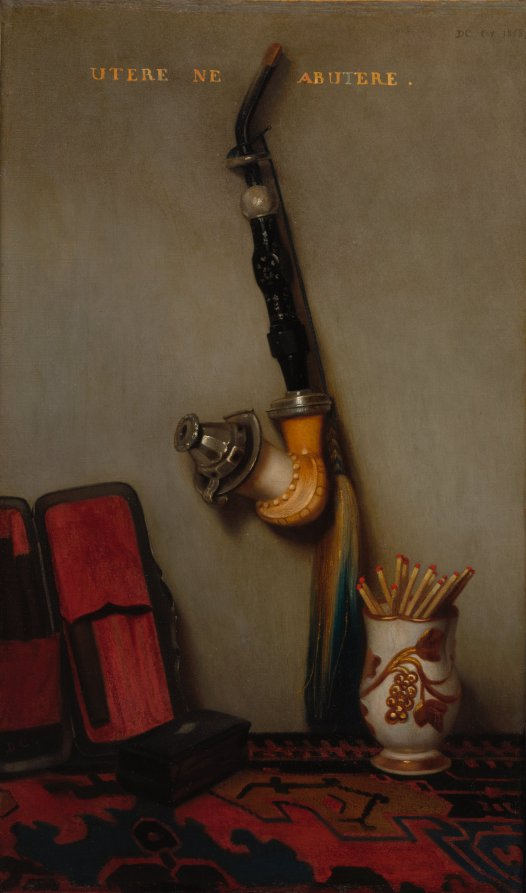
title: Still Life with Pipe and Matches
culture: France, 19th century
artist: Alexandre-Gabriel Decamps (French, 1803–1860)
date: 1858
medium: oil on fabric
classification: Painting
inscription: Signed lower left: dc; upper right: dc rev 1858; inscribed above: utere ne abutere [Use, not abuse]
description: The artist was a smoker. In this composition the place of honor is given to a pipe made in Austria around the middle of the 19th century. It is made of precious materials—meerschaum, silver, amber, horn, or lacquered wood—that are carefully fashioned, all lovingly rendered by the artist. The cord with a tassel (perhaps horsehair) is not just a decorative element, it is a security measure in case the precious bowl of the pipe becomes detached from the pipe stem. The pipe is surrounded by ordinary smoker's accessories—a cigar case, a snuffbox, and a match holder in porcelain—all placed on a Turkish rug. The Latin inscription translates: "Use, not abuse." In 1858 Decamps was 55 years old and not in the best of health. Perhaps a doctor had advised him to reduce his consumption of tobacco.